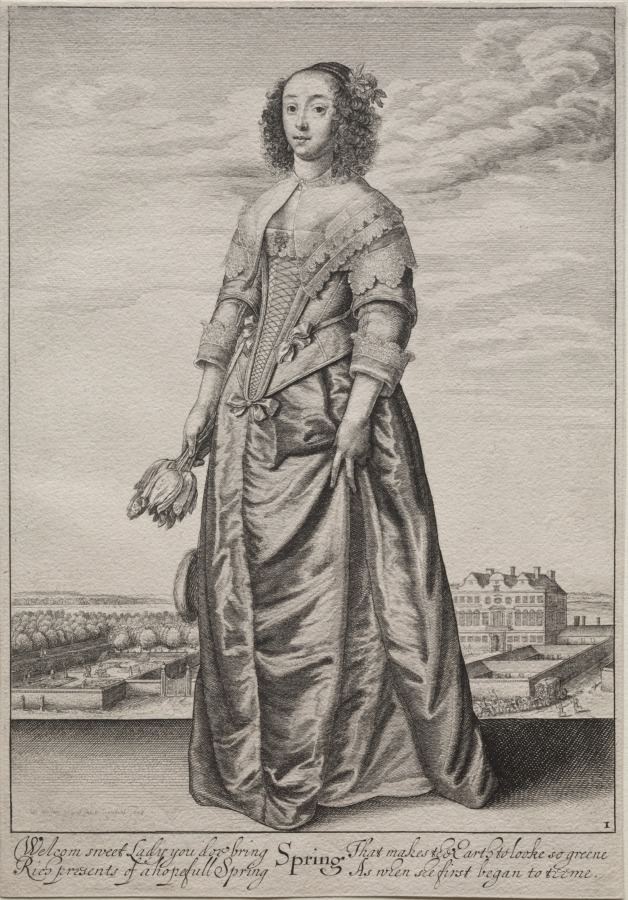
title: The Seasons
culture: Bohemia, 17th century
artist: Wenceslaus Hollar (Bohemian, 1607–1677)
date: 1643–1644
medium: etching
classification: Print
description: Increments of time, such as the seasons, were one of the most popular subjects for printed sets. Wenceslaus Hollar alone made six different versions. Hollar was a professional printmaker with over 3,000 prints to his credit. Born in Bohemia, he worked in Germany, London, and Antwerp. He came to London in 1636 while in the employ of the Earl of Arundel, an important collector that Hollar met in Germany. Apparently free to pursue independent projects, Hollar designed and etched this series around 1643–44. Here, each season is personified by elegantly clad ladies, appropriately dressed for their particular climate, with recognizable landmarks in and around London in the backgrounds. The inscriptions, in an older version of English, are slightly suggestive, in keeping with the lighthearted character of the imagery. The inscription reads: "Welcome sweet Lady you do bring / Rich presents of a hopeful Spring / That makes the Earth to look so green / As when she first began to teem."